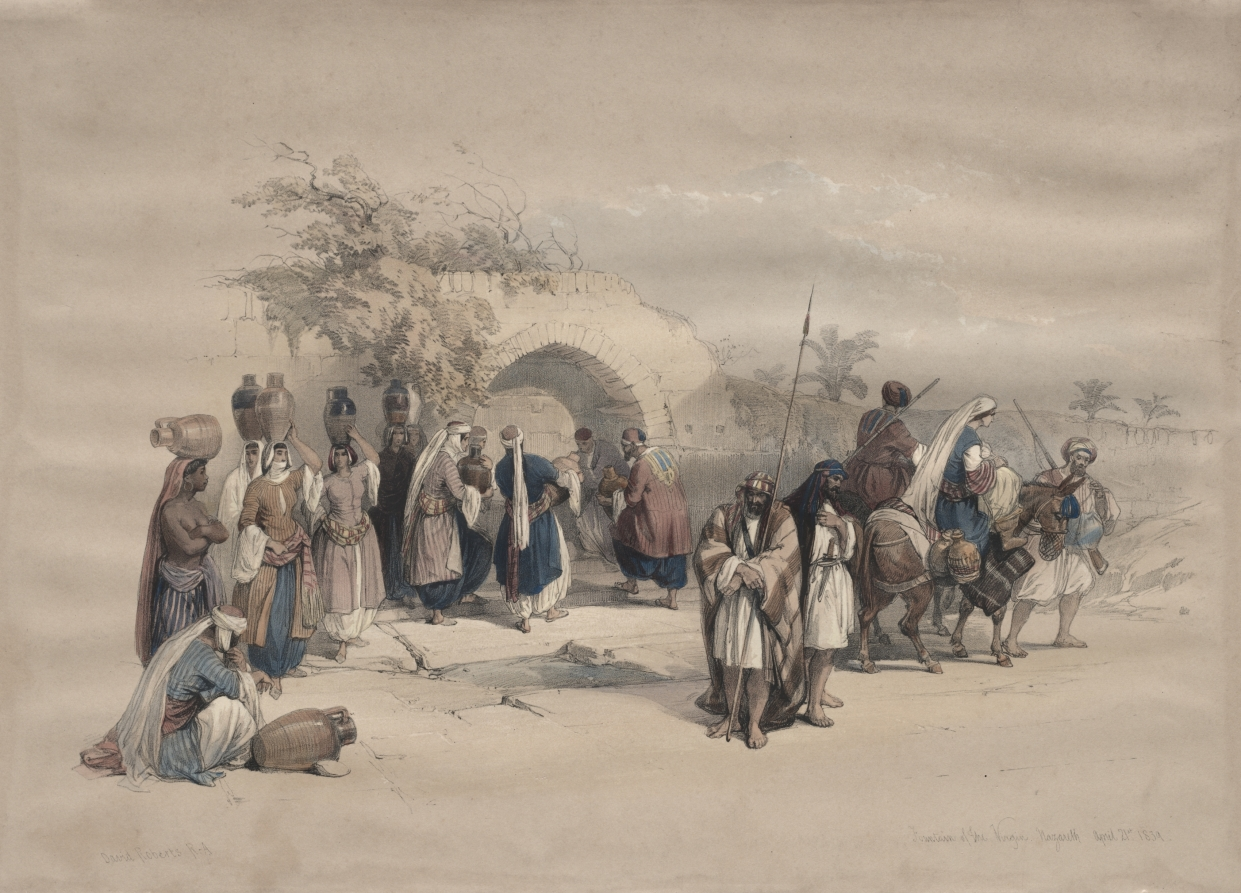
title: Fountain of the Virgin, Nazareth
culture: England, 19th century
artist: David Roberts (Scottish, 1796–1864)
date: 1839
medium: color lithograph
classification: Print